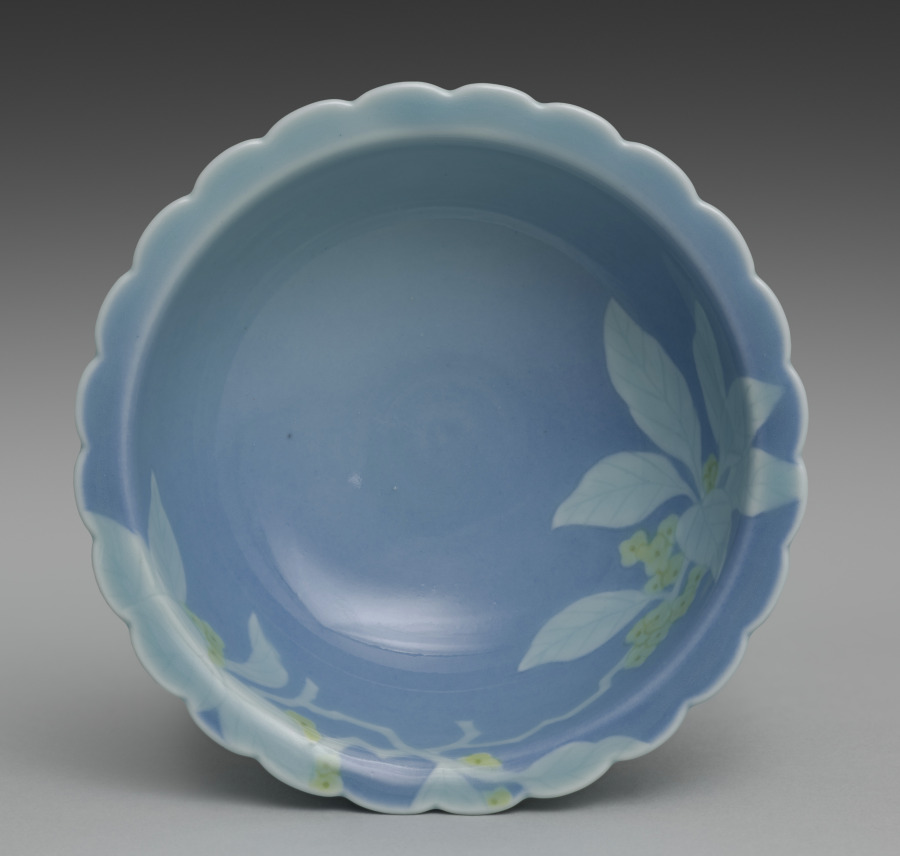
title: Dish from Dishes with Flowers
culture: Japan, Taishō period (1912–26) or Shōwa period (1926–89)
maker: Seifū Yohei IV (Japanese, 1872–1951)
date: 1914–46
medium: One from a set of five dishes; porcelain with underglaze yellow and blue glaze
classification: Ceramic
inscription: 清風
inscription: 清風造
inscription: 成山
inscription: 清風盧人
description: One can imagine a cool summer breeze when looking at this set of dishes, each shaped with a crenulated mouth and glazed with blue. Around the rim and into the basin, the bowls have low-relief designs of flowers with underglaze yellow petals; their leaves and stems show white through the glaze. On each dish, the design continues over the rim onto one side.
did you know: Seifū Yohei IV’s dishes with flowers feature underglaze yellow.